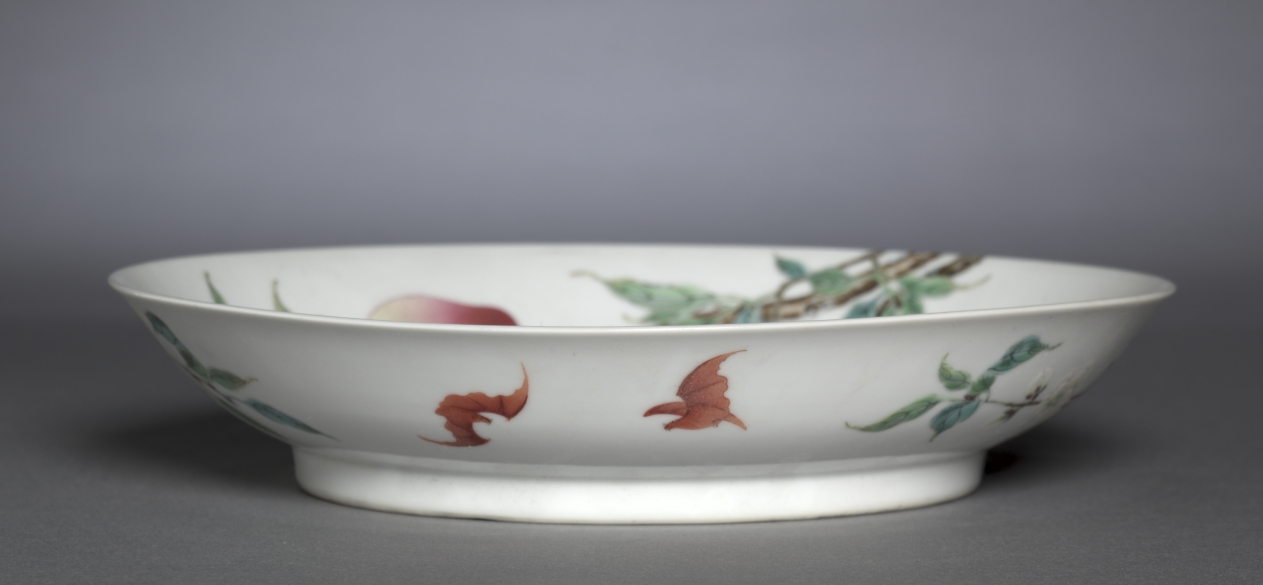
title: Dish with Bats and Peaches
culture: China, Jiangxi province, Jingdezhen kilns, Qing dynasty (1644-1911), Yongzheng mark and reign (1722-35)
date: 1723–35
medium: porcelain with famille rose overglaze enamel decoration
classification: Ceramic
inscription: 大清雍正年制